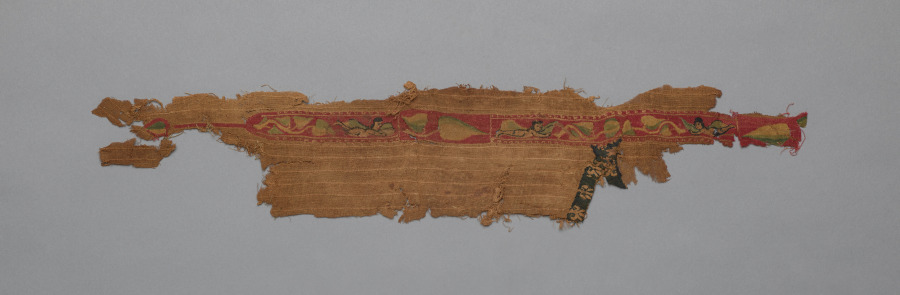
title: Fragment from a Tunic: Neck Opening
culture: Egypt, Umayyad period (661–750)?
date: 600s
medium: tabby weave, inwoven tapestry ornament; wool and linen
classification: Textile